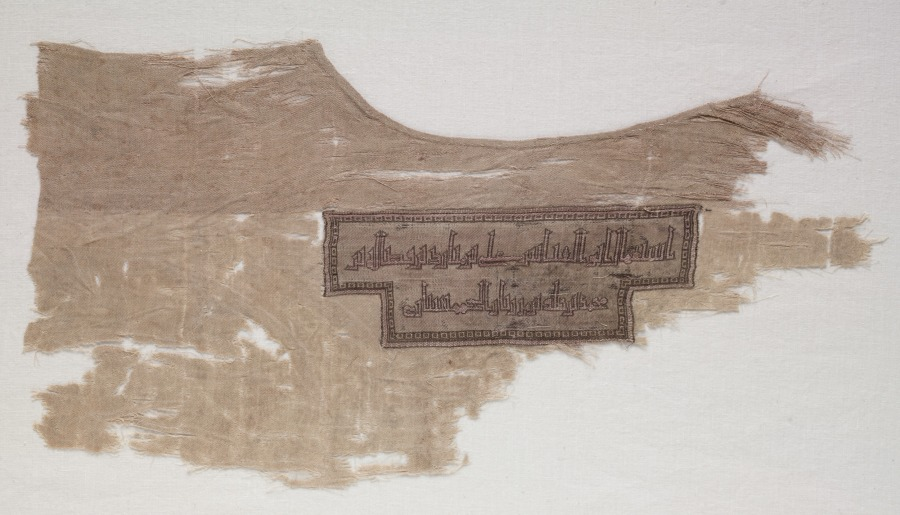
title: Fragments from a Garment with Inscription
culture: Iran or Iraq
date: 1900s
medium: Silk: lampas weave, brocaded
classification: Textile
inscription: Centered below the neckline is a T-shaped cartouche bordered with a block motif and enclosing two lines of inscription: 1) "[For] the use of Abu al-'Abbas 'Ali bin Mubarak bin Fudalah bin" and 2) "Muhammad bin Khalaf bin Marzuban al Jahshiyari."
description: These two fragments are a portion of a sleeve and the neck edge of a garment. Centered below the neckline is a T-shaped cartouche bordered with a block motif and enclosing two lines of inscription.